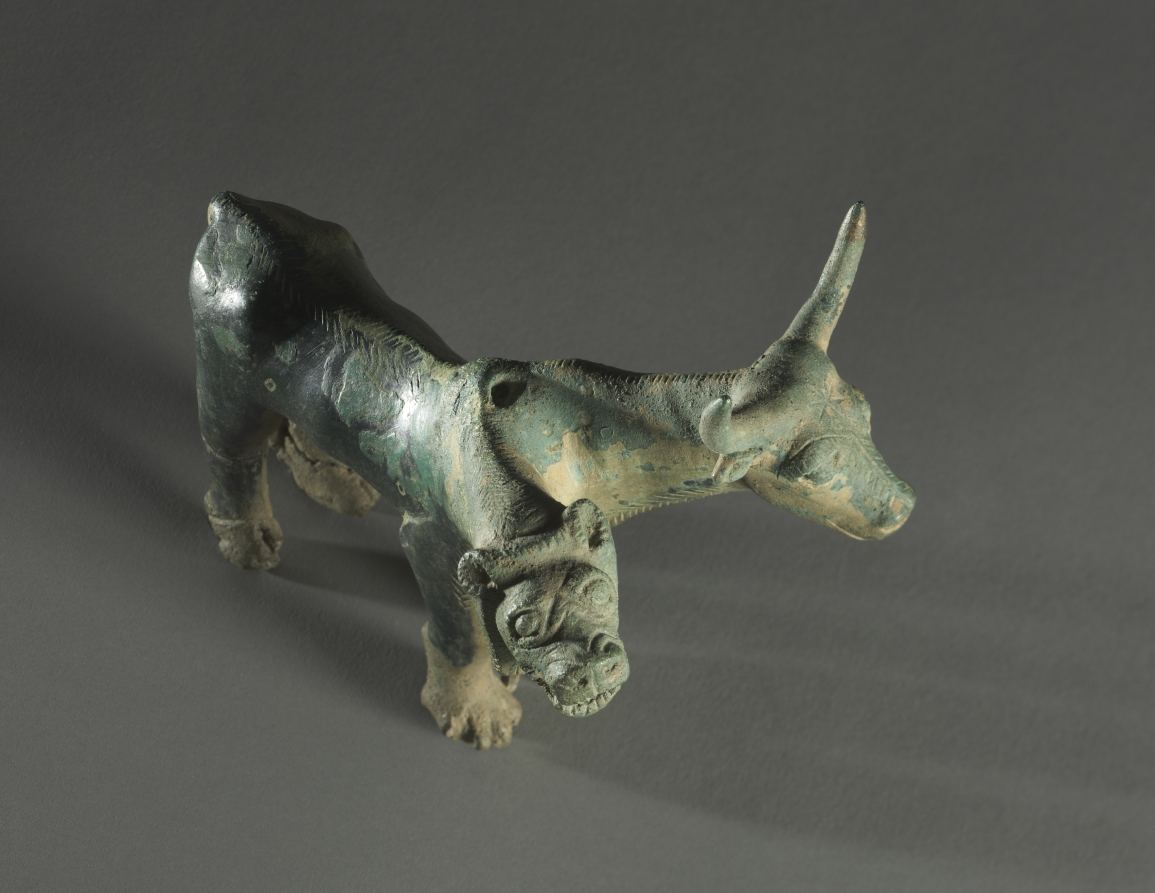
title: Composite Lion and Bull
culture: Iran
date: 1500–1000 BCE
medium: bronze, cast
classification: Sculpture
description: Combining the strength of the lion and the fertility of the bull, this creature must have served as an object of worship in a temple or shrine.